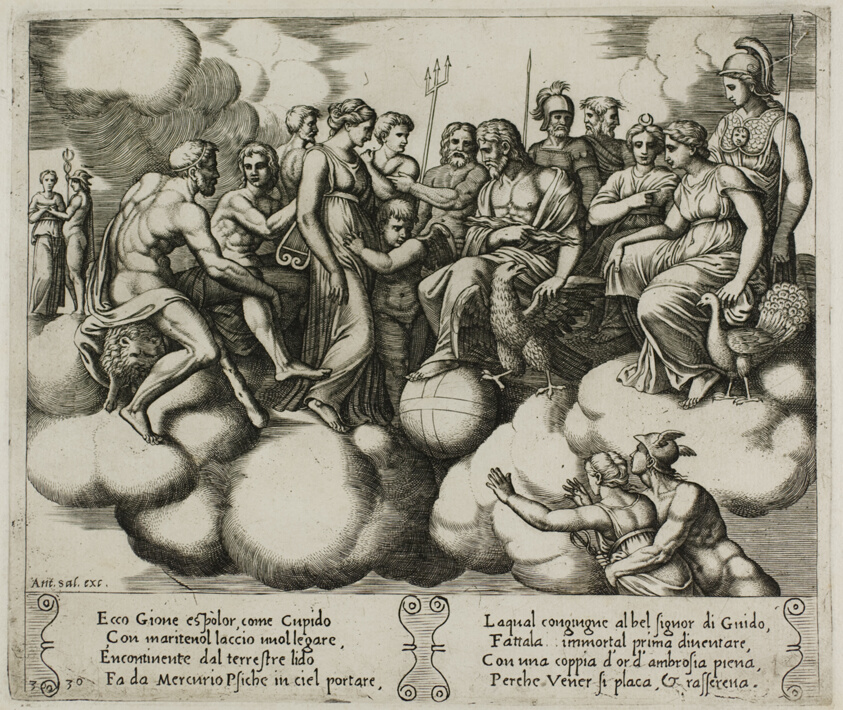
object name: Print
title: Venus and Cupid Pleading Their Cause in the Presence of Jupiter and Other Gods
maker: Master of the Die (Italian, active c. 1530-1560); after Michiel Coxcie I (Flemish, 1499-1592); in turn, inspired by Raffaello Sanzio, called Raphael (Italian, 1483-1520)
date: 1530/40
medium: Engraving in warm brown ink on cream laid paper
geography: Italy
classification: engraving; print; prints and drawing